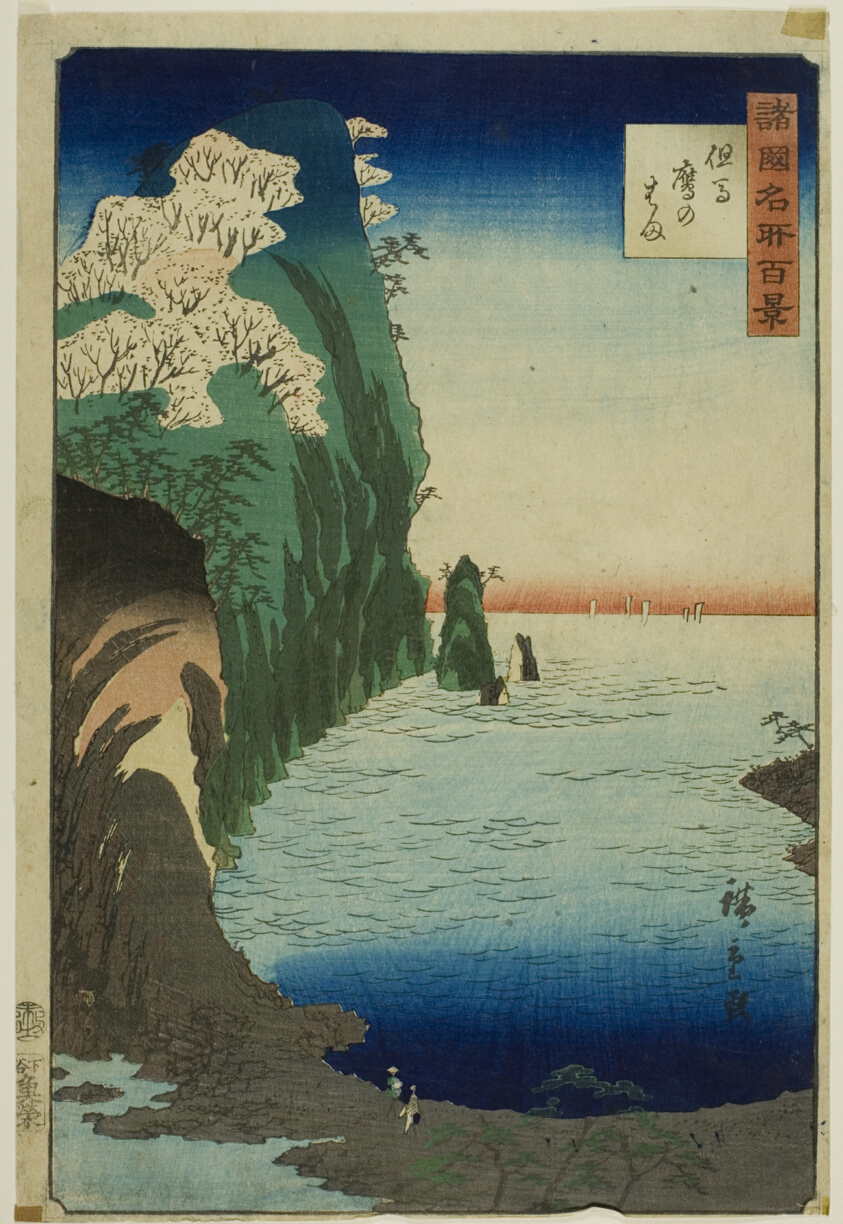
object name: Print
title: Taka Beach, Tajima Province (Tajima Taka no hama) from the series “One Hundred Famous Views in the Various Provinces (Shokoku meisho hyakkei)”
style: Japanese (culture or style)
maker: Utagawa Hiroshige II (Shigenobu) (Japanese, 1826–1869)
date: 1859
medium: Color woodblock print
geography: Japan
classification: woodblock print; print